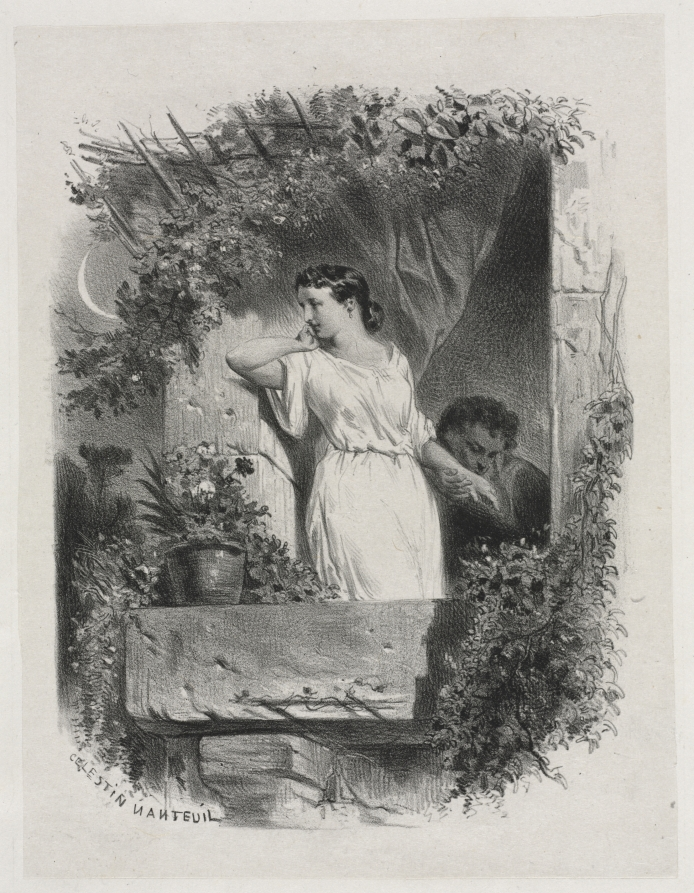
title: On the Balcony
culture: France, 19th century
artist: Célestin François Nanteuil (French, 1813–1873)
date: 1842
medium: lithograph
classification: Print